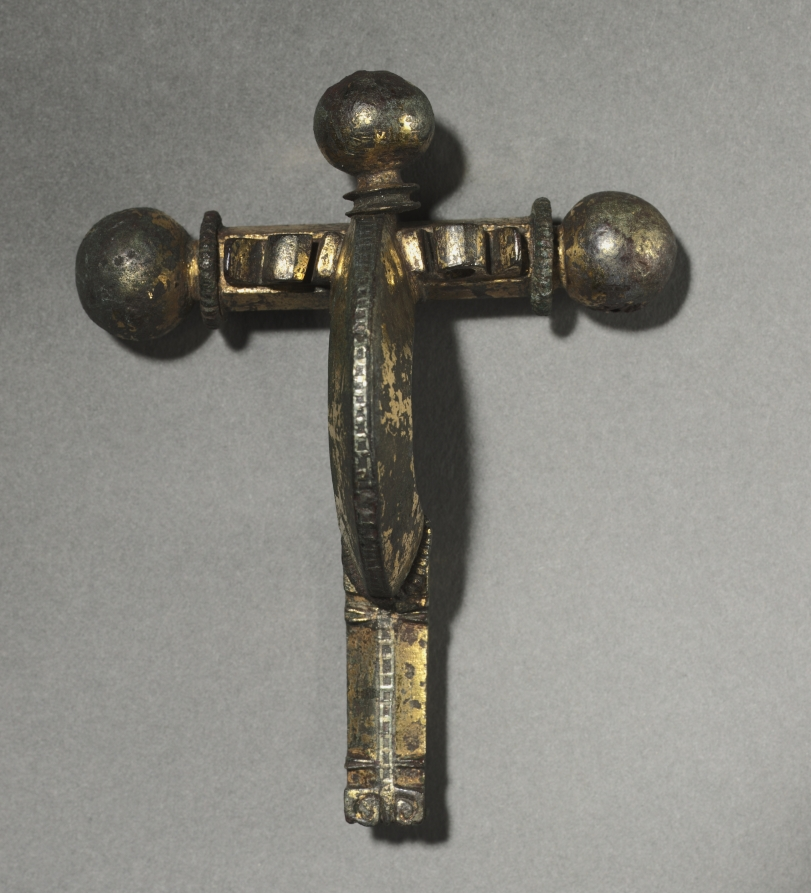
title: Crossbow Fibula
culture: Gallo-Roman or Romano-British, Migration period, 4th century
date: c. 350–400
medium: bronze, gilt-bronze, silver, and niello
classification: Jewelry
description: A fibula was a garment clasp that functioned somewhat like a modern safety pin. Since buttons were not used in antiquity, fibulae were used to keep a cloak closed. They were worn by both men and women, commonly on the right shoulder, and produced in various sizes and shapes. Because they were highly visible accessories, they often received decorative gilding, inlay decoration, or "onion"- shaped domes. Crossbow fibulae were introduced by the Romans and are named for their resemblance to the weapon. Decorative and technical features of this group suggest they may have been made in Roman-occupied Britain.